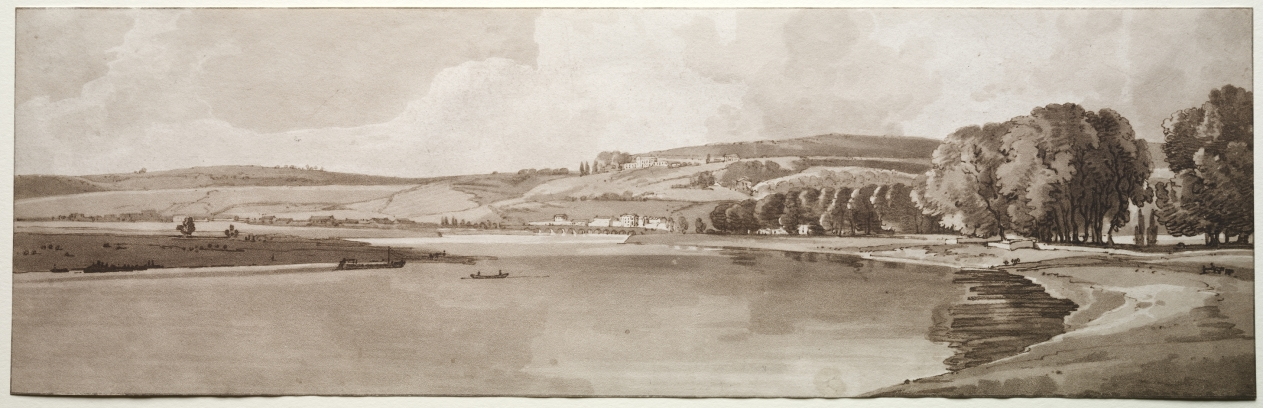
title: A Selection of Twenty of the Most Picturesque Views in Paris: View of Belle Vue & Pont de Sêve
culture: England, 19th century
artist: Thomas Girtin (British, 1775–1802)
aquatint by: Frederick Christian Lewis (British, 1779–1856)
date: 1802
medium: Softground etching and aquatint printed in brown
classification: Print